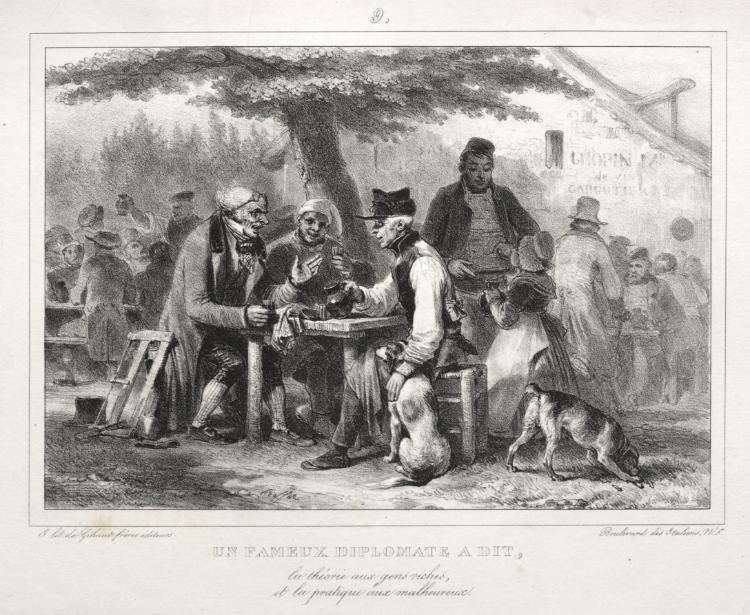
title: Album for 1832: Un famous diplomat à dit...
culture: France, 19th century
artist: Auguste Raffet (French, 1804–1860)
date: 1832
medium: lithograph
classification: Print